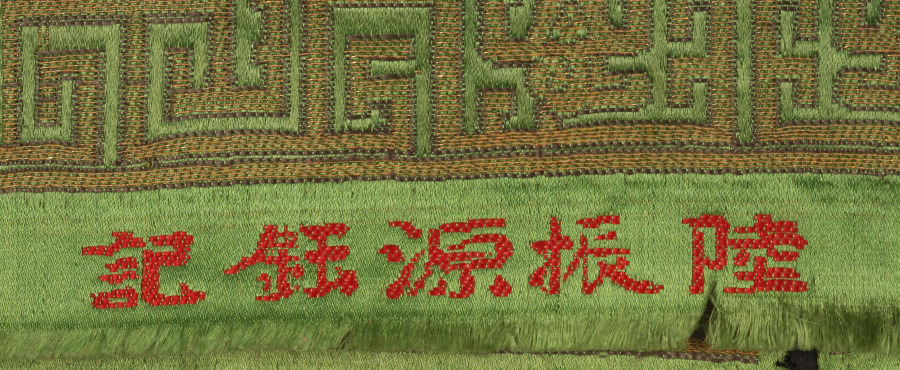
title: Skirt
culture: China, Qing dynasty (1644-1911)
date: late 1800s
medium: Silk and gold thread: embroidery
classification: Garment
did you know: This is a bridal skirt that would be worn with a coat like CMA 1916.1355.